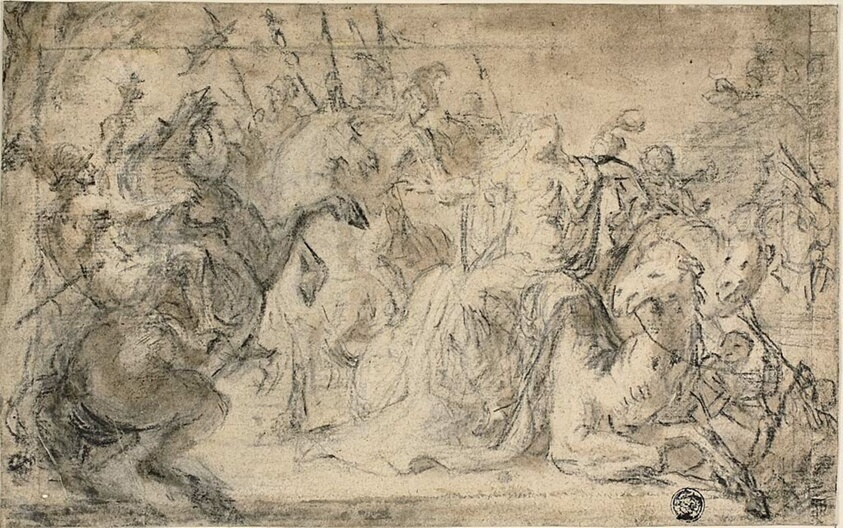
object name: Drawing and Watercolor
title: Zenobia Surrounded by Mounted Soldiers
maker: Attributed to Justus van Egmont (Flemish, 1601-1674); or Philips Wouwerman (Dutch, 1619-1668)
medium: Black chalk with brush and brown wash and touches of graphite, on cream laid paper, pieced together and laid down on board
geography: Flanders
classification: chalk; drawings (visual works); prints and drawing